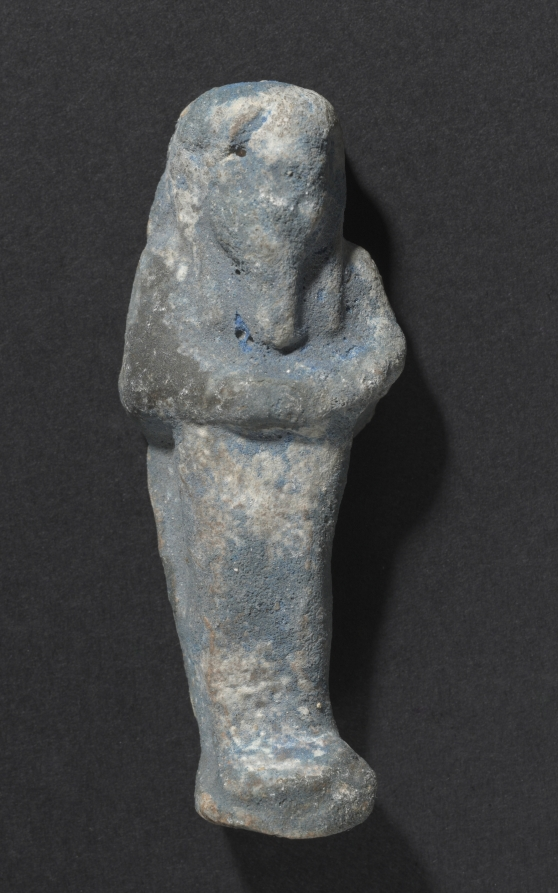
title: Shawabty of Ditamenpaankh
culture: Egypt, Late period (715–332 BCE), Dynasty 25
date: 715–656 BCE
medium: terracotta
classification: Funerary Equipment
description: High demand for shawabtys in the Late Period, a time when as many as 400 or more shawabtys were placed in the tomb with the deceased, gave rise to a specialized container for storing them: the shawabty box. This example is inscribed for the lady of the house, Ditamenpaankh, and was probably one of a pair originally made for her. The single-masted boat on the box's lid is perhaps an allusion to the pilgrimage of the deceased to the holy city of Abydos, the cult city of Osiris, king of the dead. The shawabtys inside are crude, mass-produced examples cast in an open mold. Made of terracotta, their blue paint imitates more costly shawabtys made of faience. As for the shawabty spell, it has been removed from its traditional location on the shawabty's front and relocated onto the sides of box, where it needed only to be written once, thus expediting production.